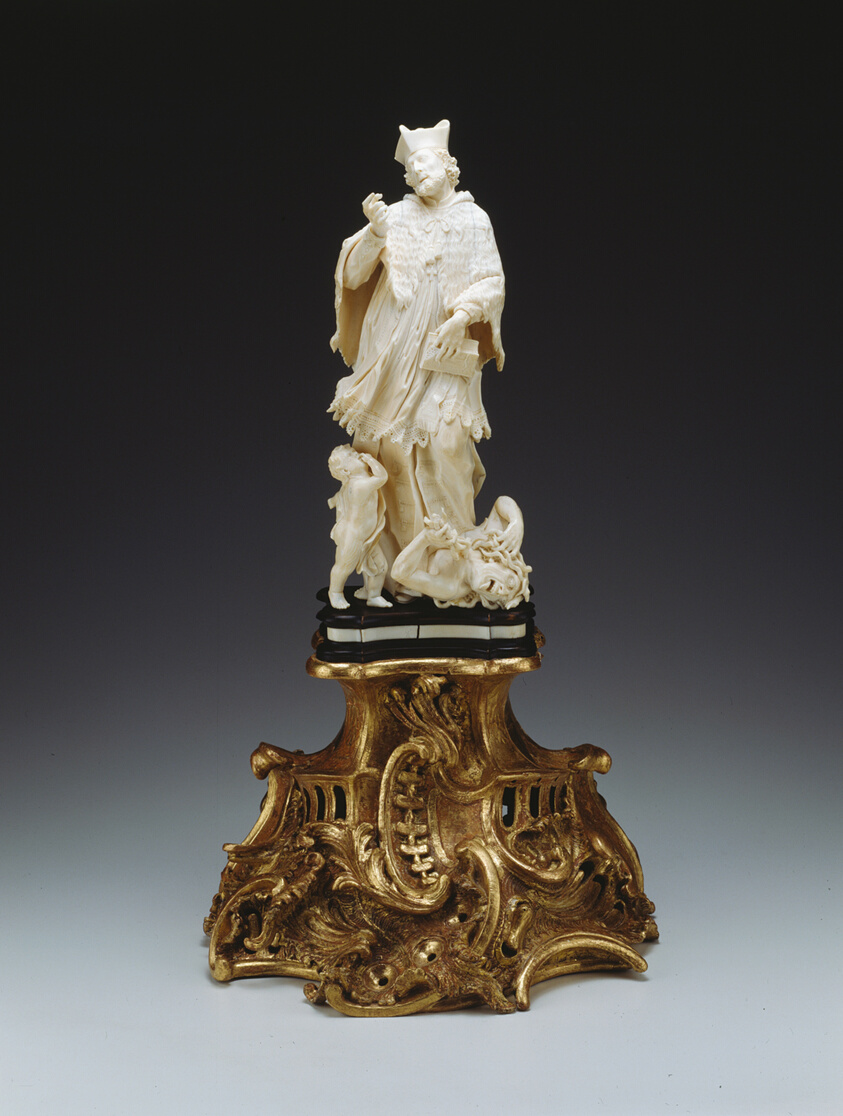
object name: Sculpture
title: Saint John of Nepomuk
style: 18th Century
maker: Peter Hencke (German, active by 1743–1777)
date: c. 1750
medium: Ivory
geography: Germany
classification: statuette; sculpture; figure; german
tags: saints, babies, children, Christian subjects, Christianity, man, religion, religious figures